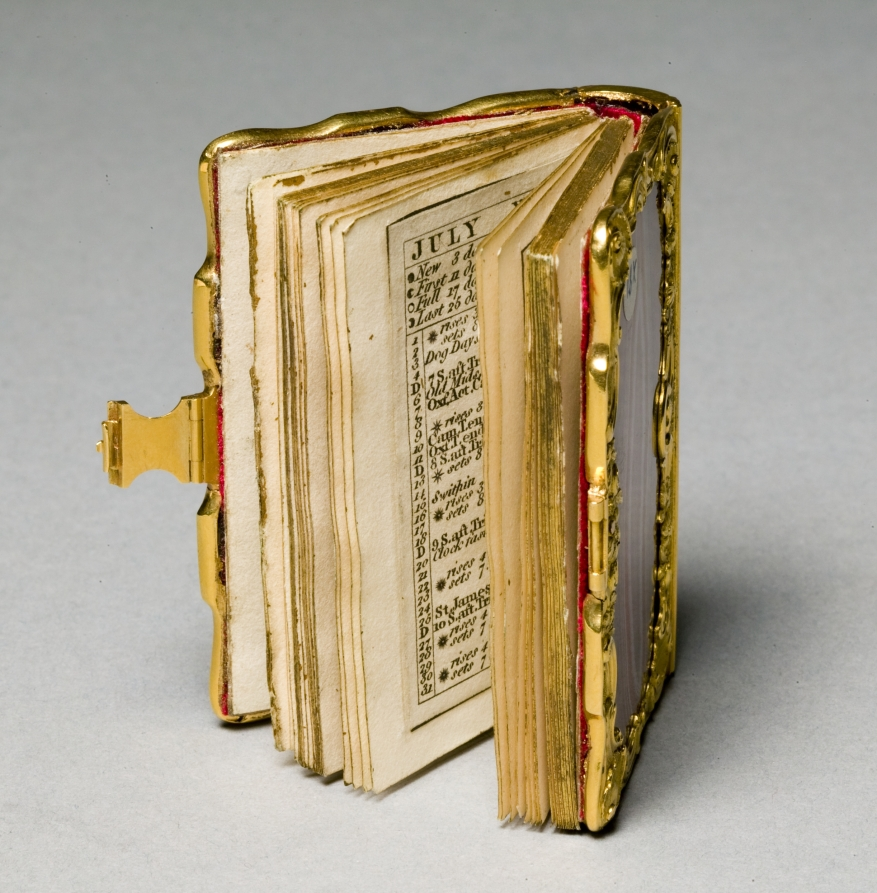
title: Almanac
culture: England, early 19th century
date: 1818–1830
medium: agate and gold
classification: Miscellaneous